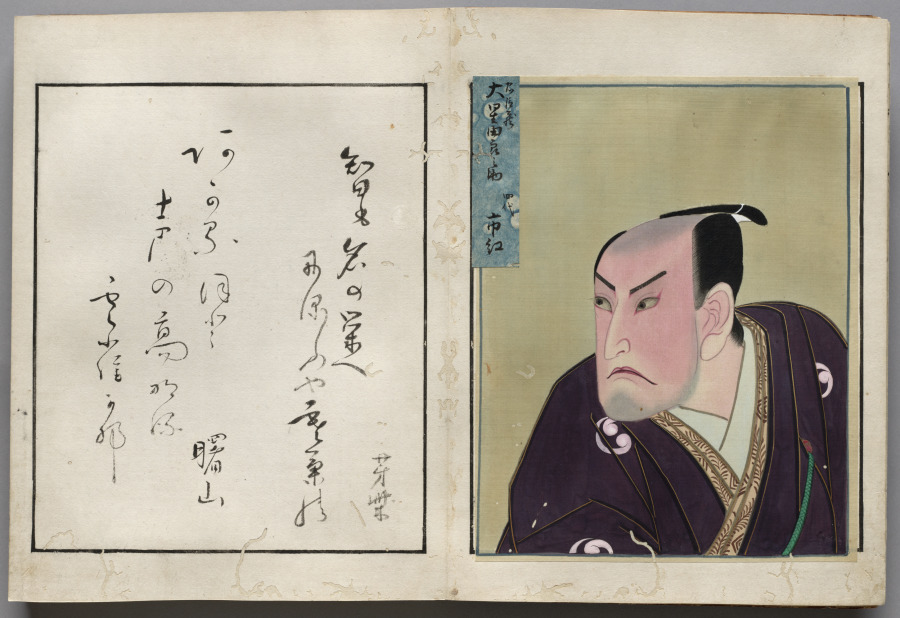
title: Double-Leaf from Album of Actor Portraits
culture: Japan, Edo period (1615–1868)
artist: Shōrakusai (Japanese)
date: c. 1790–1810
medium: double-leaf from an accordion-style album; ink and color on silk (right) and ink on paper (left)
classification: Bound Volume